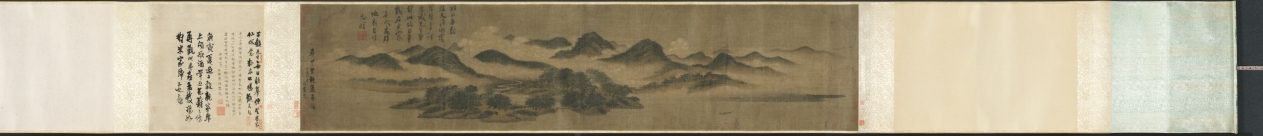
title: Cloudy Mountains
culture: China, Southern Song dynasty (1127-1279)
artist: Mi Youren (Chinese, 1072–1151)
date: 1130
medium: Handscroll; ink and color on silk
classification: Painting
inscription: 好山無數接天涯，烟靄陰晴日夕佳。/ 要識先生會到此，故留筆戲在君家。/ 庚戍歲，辟地新昌作。元暉。/ [seal] 元暉戲作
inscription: [Seal] 安陽孫氏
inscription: [Seal] 畢瀧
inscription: [Seal] 成親王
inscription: [Seal] 永瑆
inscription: [Seal] 錫三 appears twice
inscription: [Seal] 養性齋珍藏書畫印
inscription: [Seal] 芷陔審定真跡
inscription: [Seal] 玉簡齋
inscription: 2 colophons (1 dated 1650), inscription dated 1647, and 2 seals of Wang To (1592–1652)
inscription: 1 colophon, dated second month of the gengyin year 庚寅 (1650), and 2 seals of Chen Kuang 陳爌 (1646 jinshi degree)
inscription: 7 seals unidentified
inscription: A separate scroll containing six colophons on Cloudy Mountains exists; the inscribers are Luo Zhenyu 羅振玉 (1866–1940), Naito Torajiro 內藤虎次郎 (1866–1934), Nagao Ko 長尾甲 (1864–1942), and Wu Changshuo 吳昌碩 (1844–1927). Naito Torajiro alone wrote three colophons.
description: Cloudy Mountains captures the view of a lush and misty riverscape, an impression of Mi Youren’s new environment, painted in a moment of peace. With the fall of the Northern Song dynasty in 1127 upon the Jurchen’s military invasion, Mi Youren fled south across the Yangzi River. In 1130, he had reached Xinchang in Zhejiang province and thanked his host with this painting for having given him shelter. Mi Youren was the oldest son of the art critic Mi Fu (1051– 1107); both developed a distinct style of mountain scenery by accumulating wet ink dots that create a hazy atmosphere.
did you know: This scroll is one of the museum’s earliest dated Chinese paintings.